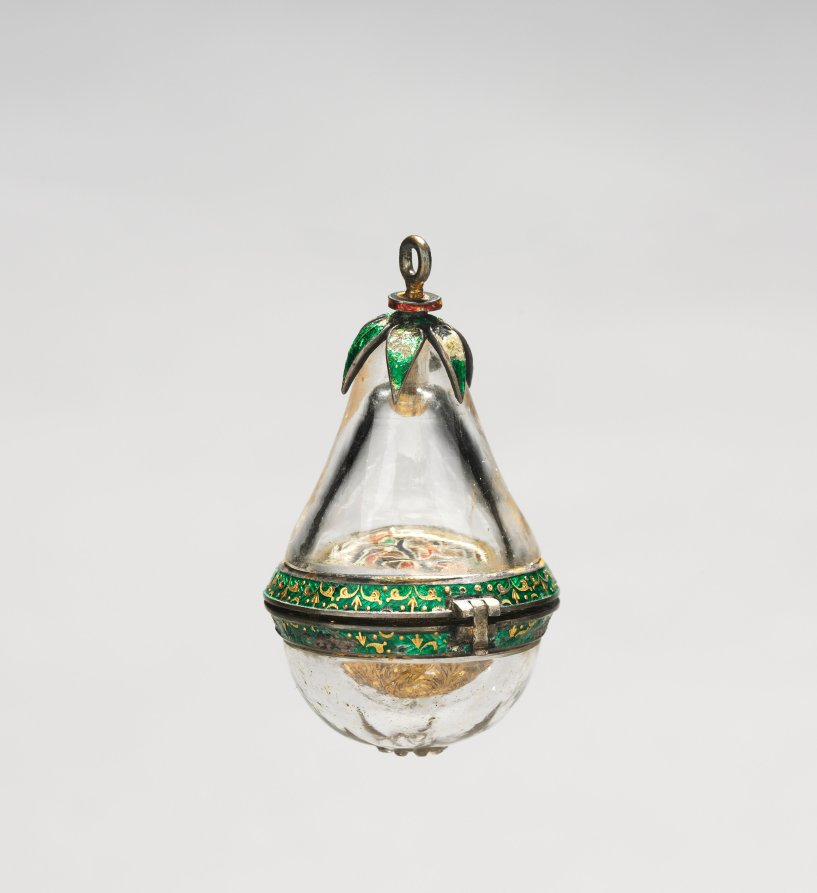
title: Pomander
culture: Mughal India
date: 1600s–1700s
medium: spherical rock crystal cover with enameled silver mounts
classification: Rock crystal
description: This tiny pear-shaped vial worn tied to a sash would have held scented water or oil. The lid opens to reveal a perforated sprinkler decorated with fine filigree and colorful enamel. A popular scent was attar of roses, made from the essential oil of rose petals.